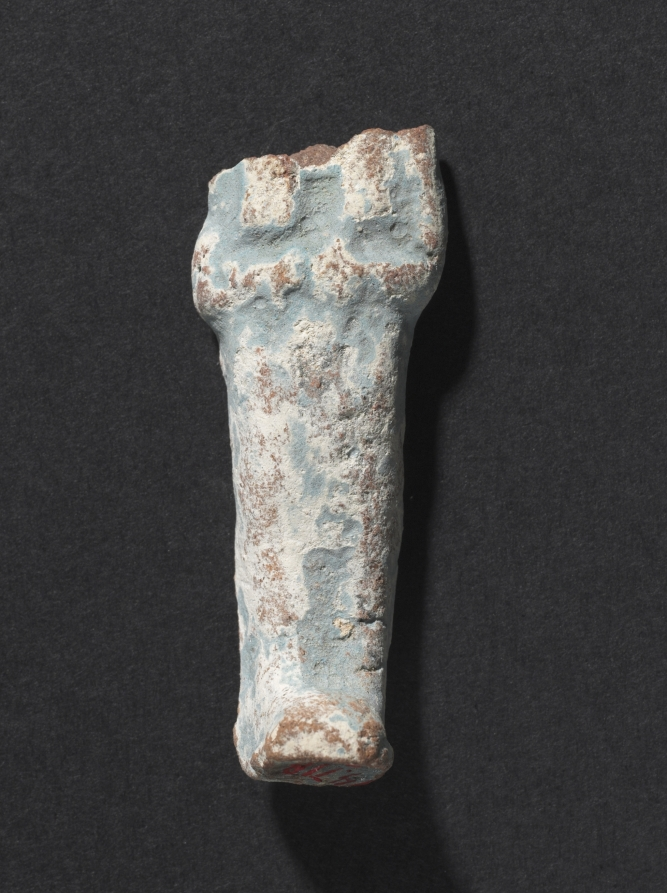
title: Shawabty of Ditamenpaankh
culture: Egypt, Late period (715–332 BCE), Dynasty 25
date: 715–656 BCE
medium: terracotta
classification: Funerary Equipment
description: High demand for shawabtys in the Late Period, a time when as many as 400 or more shawabtys were placed in the tomb with the deceased, gave rise to a specialized container for storing them: the shawabty box. This example is inscribed for the lady of the house, Ditamenpaankh, and was probably one of a pair originally made for her. The single-masted boat on the box's lid is perhaps an allusion to the pilgrimage of the deceased to the holy city of Abydos, the cult city of Osiris, king of the dead. The shawabtys inside are crude, mass-produced examples cast in an open mold. Made of terracotta, their blue paint imitates more costly shawabtys made of faience. As for the shawabty spell, it has been removed from its traditional location on the shawabty's front and relocated onto the sides of box, where it needed only to be written once, thus expediting production.